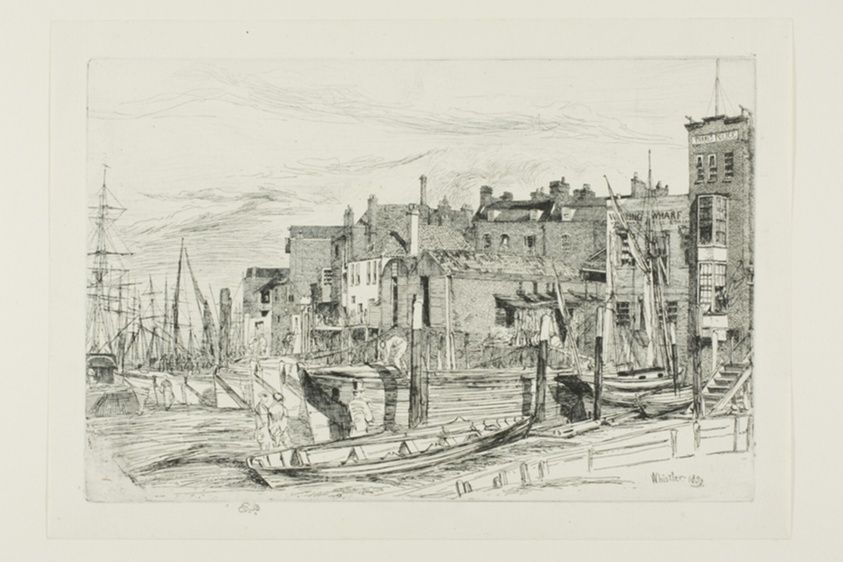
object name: Print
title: Thames Police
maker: James McNeill Whistler (American, 1834-1903)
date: 1859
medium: Etching and drypoint with foul biting in black ink on ivory laid paper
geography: United States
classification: etching; drypoint; foul biting; print; prints and drawing; paper